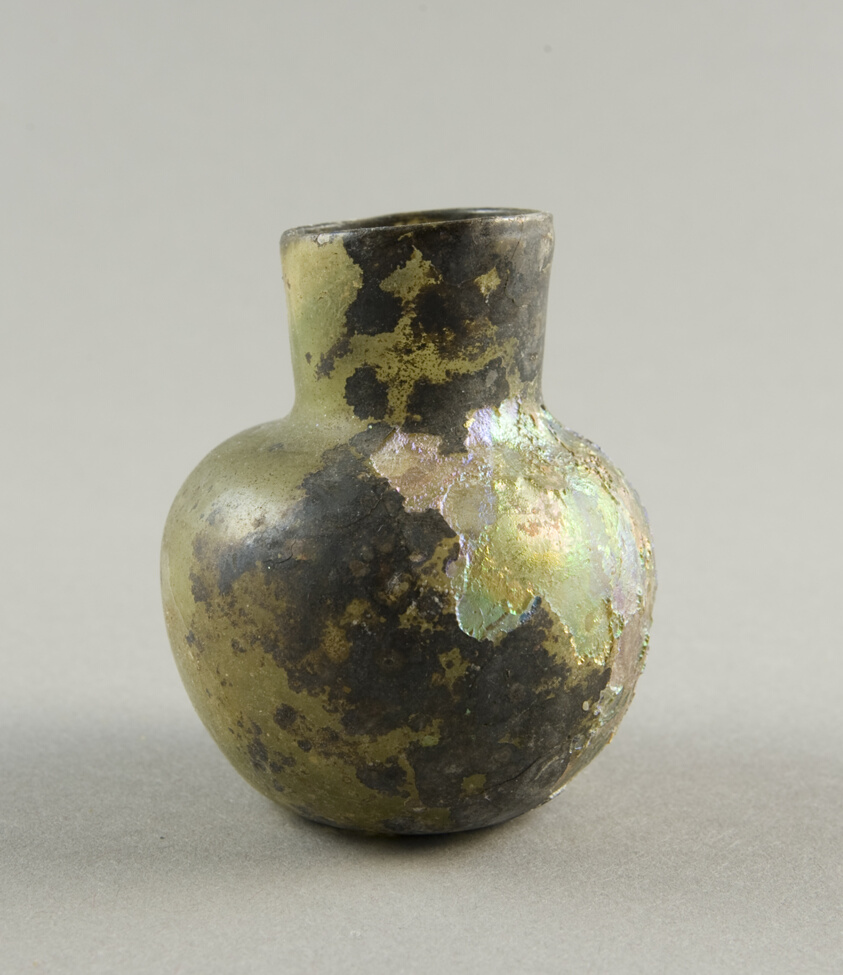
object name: Vessel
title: Jar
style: ancient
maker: Roman or Byzantine; Eastern Mediterranean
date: 2nd-6th century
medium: Glass, blown technique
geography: Mediterranean Region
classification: glass; vessel; ancient art